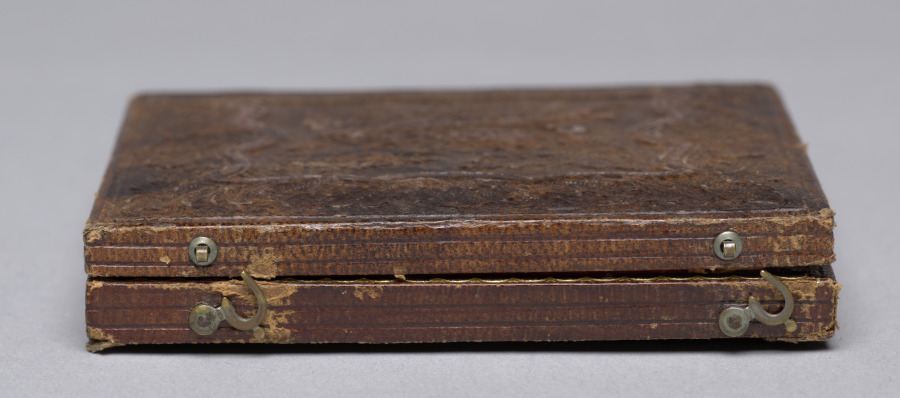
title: Black Woman and White Child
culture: America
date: c. 1855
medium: daguerreotype, sixth plate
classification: Photograph